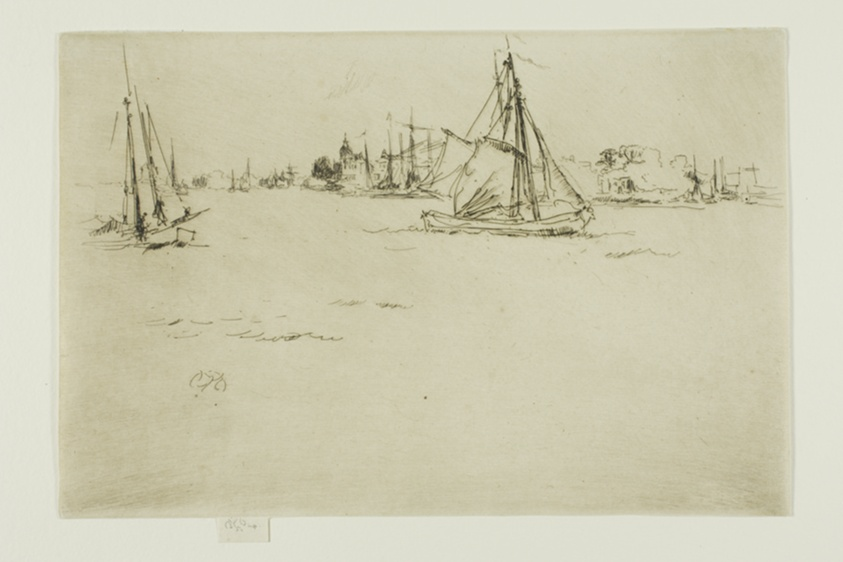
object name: Print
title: Dordrecht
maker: James McNeill Whistler (American, 1834-1903)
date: 1886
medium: Etching and drypoint in black ink on cream laid paper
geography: United States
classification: etching; drypoint; print; prints and drawing; paper